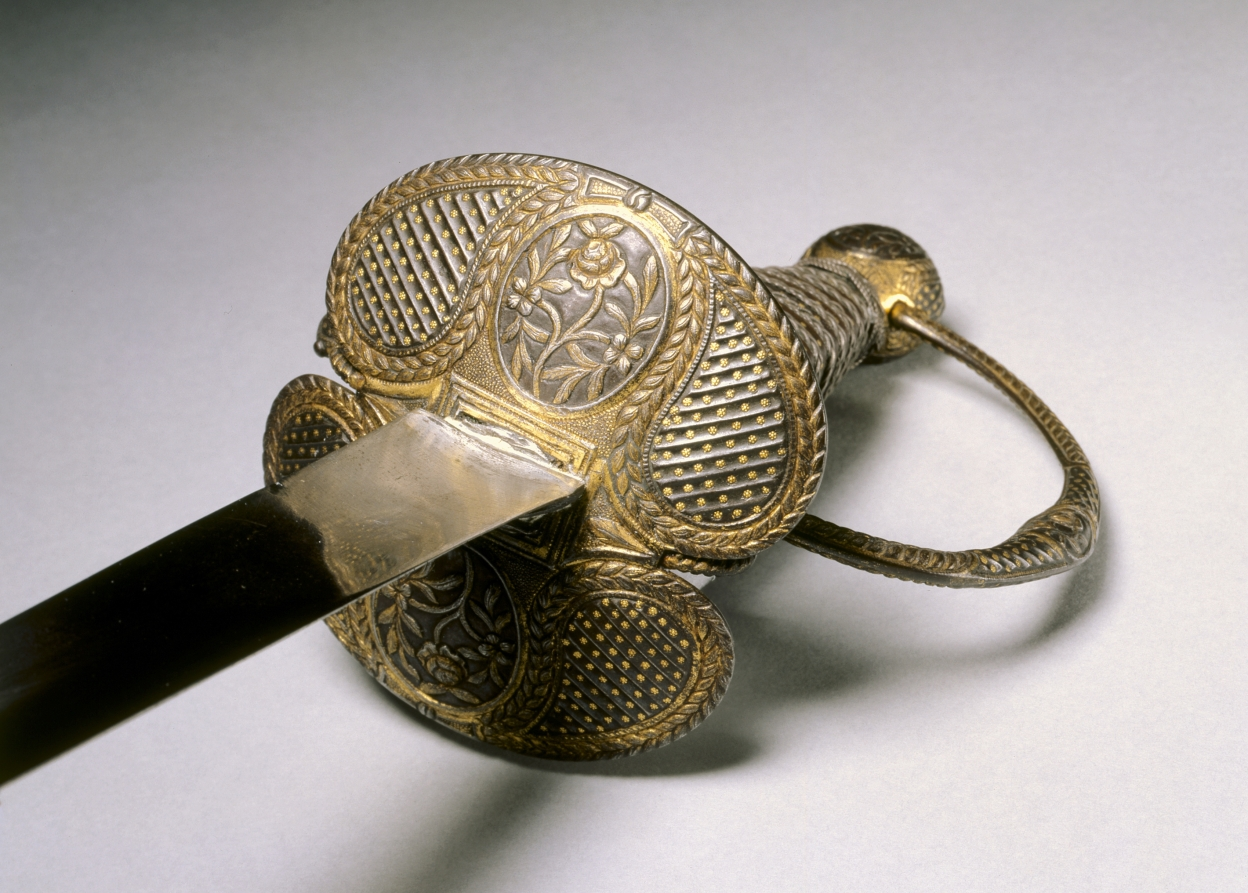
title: Small Sword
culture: France, Paris (?), 18th century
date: c. 1780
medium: forged steel blade; partially gilt and russet steel hilt; steel wire, leather bands, wood core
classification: Arms and Armor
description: During the 1700s, the small-sword emerged as a light, quick weapon. Like the rapier it was carried by unarmored civilians, the noblemen of the upper classes. Over time this delicate sword became more an accessory of male attire than a weapon essential to life and death. The sword hilt, which shows even when the blade is sheathed, became the ground for elaborate decoration. These small-swords thus represent the final stage in the evolution of the sword, from the edged weapons of antiquity to the elegantly refined blades of the 1700s and 1800s.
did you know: The fashion among gentleman for wearing small-swords with everyday attire began to wane by the end of the 1700s with the exception of the military dress sword.